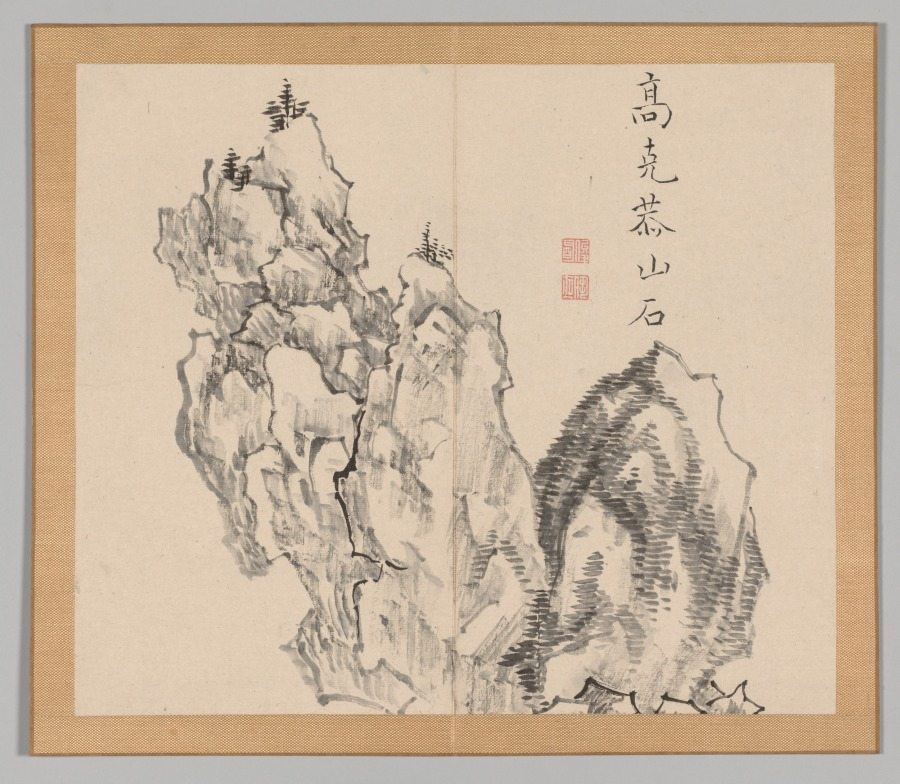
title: Reverberations of Taiga, Volume 1 (leaf 22)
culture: Japan, Edo period (1615–1868)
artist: Aoki Shukuya (Japanese, d. 1802)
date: mid- to late 1700s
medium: double-leaf from a pair of albums; ink and light color on paper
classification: Portfolio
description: Traditionally, young painters in Japan began their studies with an established master-painter. The master's compositions invariably became models that the apprentice copied to learn various ink and brush techniques. Shukuya was a pupil of the famous Kyoto artist Ikeno Taiga, whose style is reflected in these sketches of rocks, trees, and mountains.